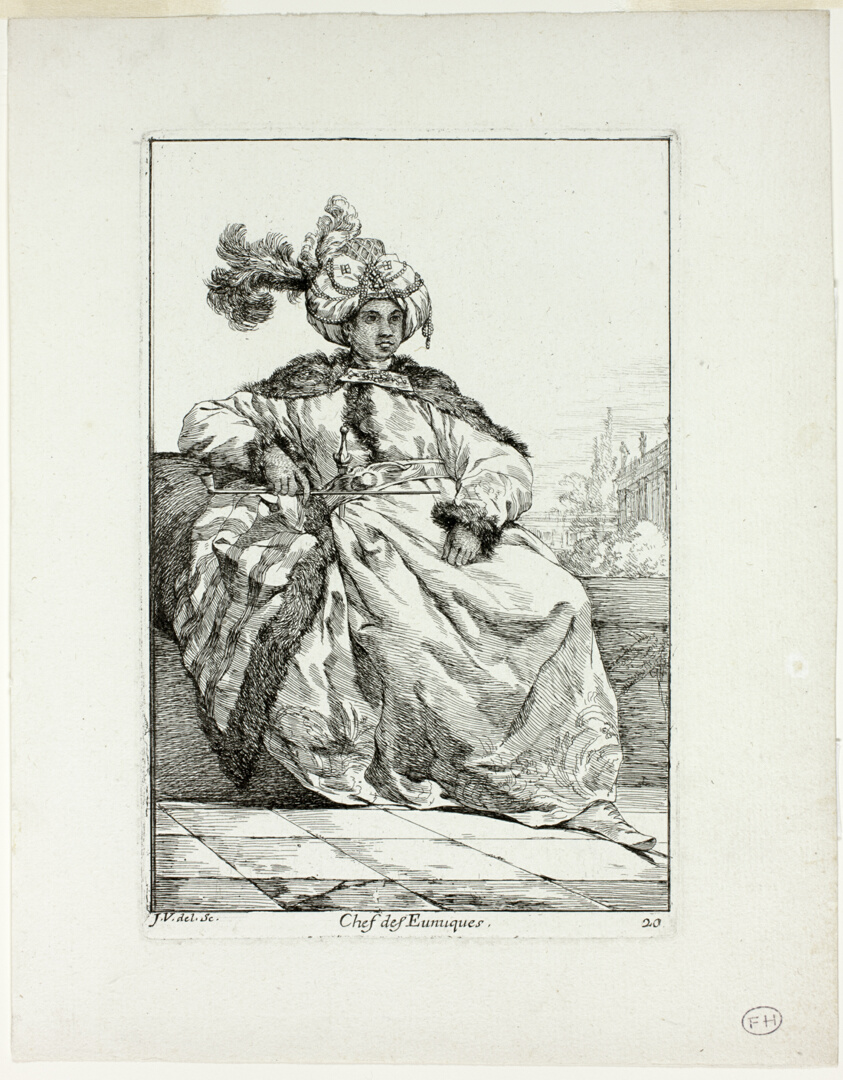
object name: Print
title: Chef des Eunuques, plate 20 from Caravanne du Sultan à la Mecque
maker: Joseph-Marie Vien, the elder; French, 1716–1809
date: 1748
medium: Etching on ivory laid paper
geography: France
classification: etching; paper; print; prints and drawing